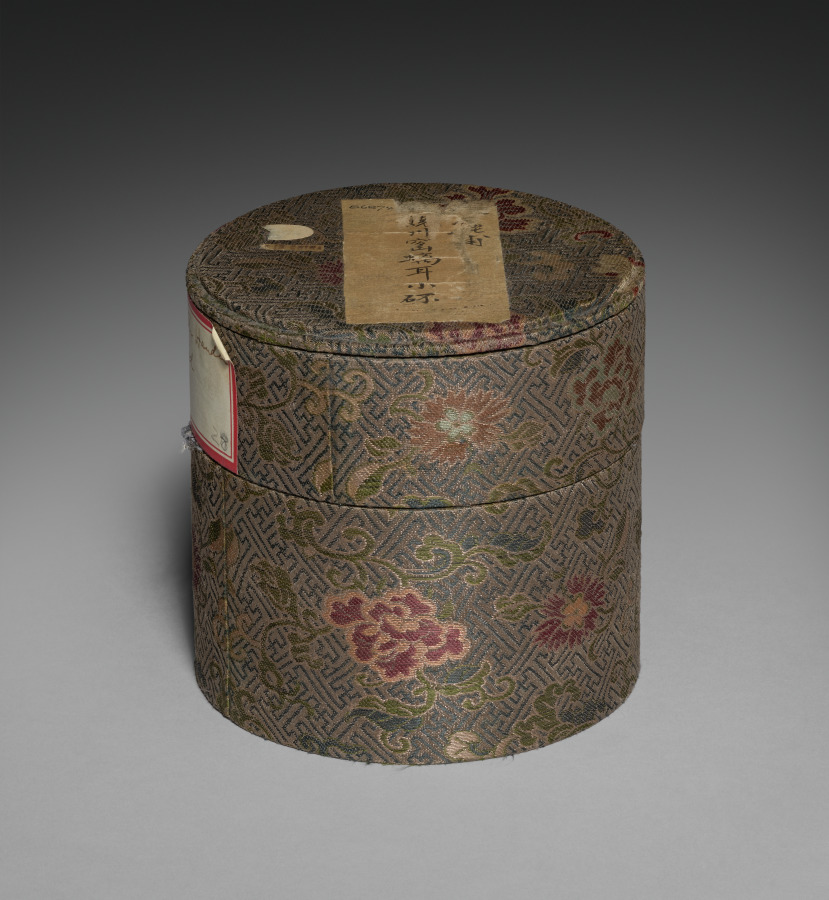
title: Fluted Cup with Dragon Handle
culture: China, Jiangxi Province, Jingdezhen kilns, Yuan dynasty (1271–1368)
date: early 1300s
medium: Glazed porcelain, Qingbai (bluish-white) ware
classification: Ceramic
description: Very thinly potted, the subtly lobed body of this cup is almost translucent. The thin, slightly opaque, light greenish glaze lends a sugary shine. Applied elements, including the handle, beaded borders, and sculptural floret, are constructed and glazed with the same materials as the body, providing a seamless blend of form and decorative embellishment. The result is an evocative reminder of slightly earlier silver cups, also created in the form of flowers. This pristine, natural construction is challenged, however, by the archaic dragon that acts as the handle. Borrowed from the decoration found on much earlier bronzes, this added form illustrates the eclecticism of the Yuan, the attempt to blend present vision with interest in the past.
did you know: Clay beading divides the cup's interior into six foliate panels with a six-petaled flower at the junction of the beaded lines.